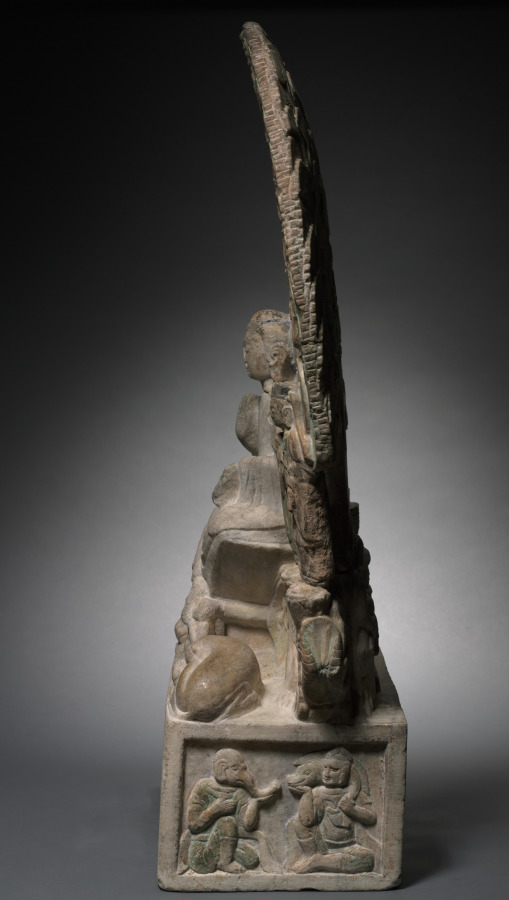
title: Stele: Maitreya as the Future Buddha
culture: China, Hebei, Six Dynasties period (317-581), Northern Qi dynasty (550-577)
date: 300s–500s CE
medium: marble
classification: Sculpture